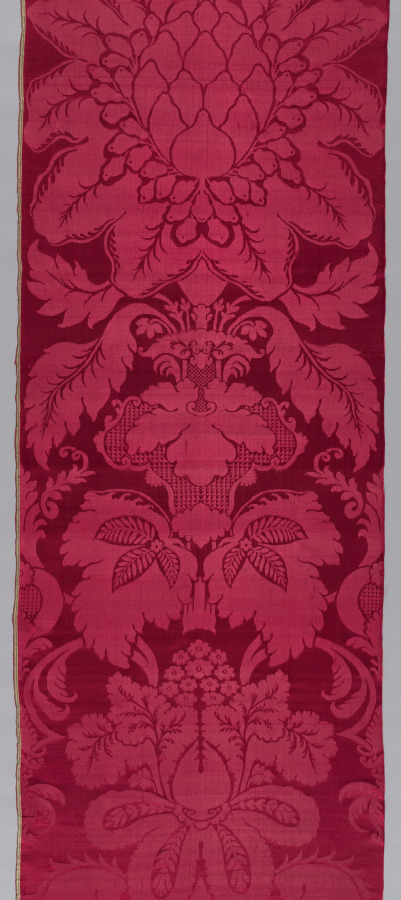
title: Two Large Damask Cloths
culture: Italy, 17th century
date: 1600s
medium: damask, silk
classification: Textile